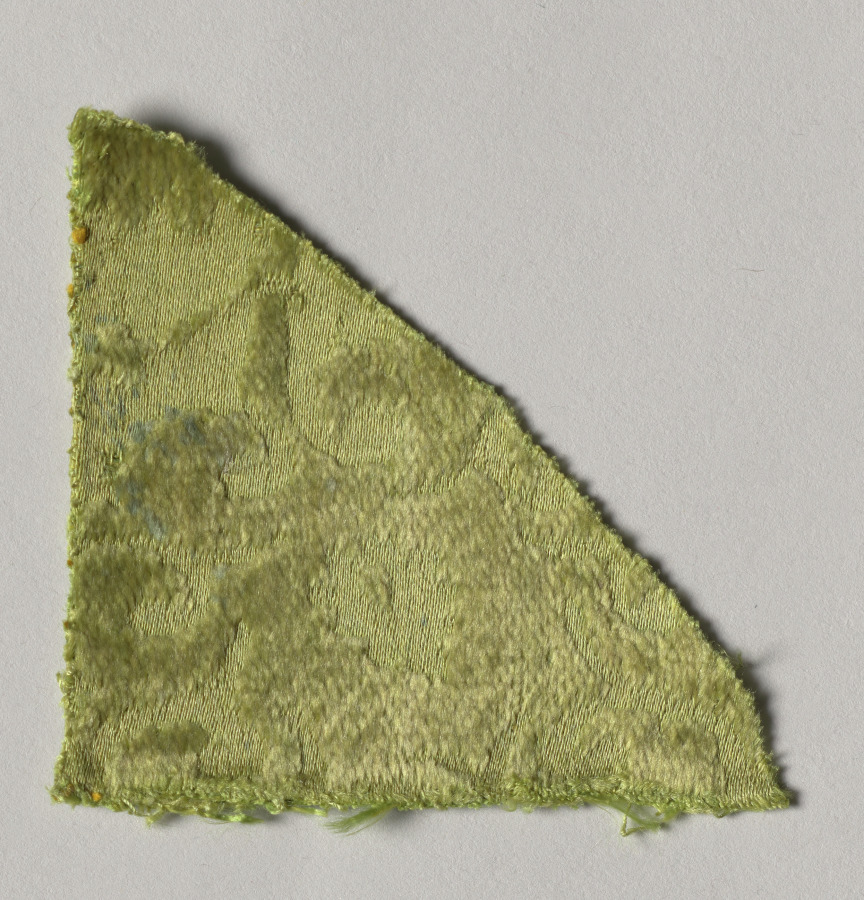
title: Fragment of a Chasuble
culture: Italy, beginning of the 15th century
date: 1400–1420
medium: velvet (cut and voided); silk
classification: Velvet